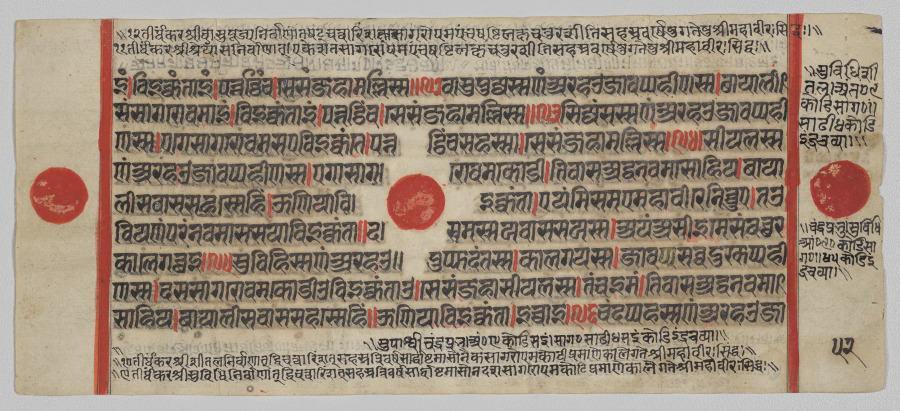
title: Text, Folio 52 (verso), from a Kalpa-sutra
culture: Western India, Gujarat, last quarter of the 15th century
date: c. 1475–1500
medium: Gum tempera, ink, and gold on paper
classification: Painting